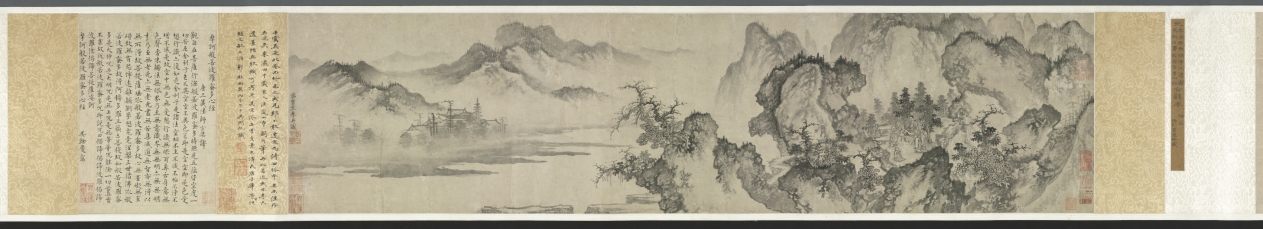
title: Buddha's Conversion of Five Bhiksu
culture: China, Yuan dynasty (1271–1368)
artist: Li Sheng (Chinese, active c. 1324–after 1375)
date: mid-1300s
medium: handscroll; ink on paper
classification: Painting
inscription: 紫篔生李升識 [印] 李氏子雲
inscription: 4 colophons and 12 additional seals: The "Heart" Sutra (Maha Prajnaparamita) text written by Wu Yuqing 吳餘慶 (active early 1400s); 2 seals of Xu Qianxue 徐乾學 (1631–1694); 3 colophons, one dated 1929 and two dated 1936, and 9 seals of Wu Hufan 吳湖帆 (1894–1968); 1 colophon, dated 1932, of Chen Dingshan; 1 seal unidentified.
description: This episode stems from the life of the historical Buddha, who, after his enlightenment, was initially hesitant about preaching his own doctrine. After much personal deliberation and prodding by deities, he finally relented. The first converts were the five guards who served him when he was still a prince. For Li Sheng, this is the pretext of the painting, which moves from the interaction of the bhiksu with the Buddha to a broader awareness of the vast surroundings of the scene.